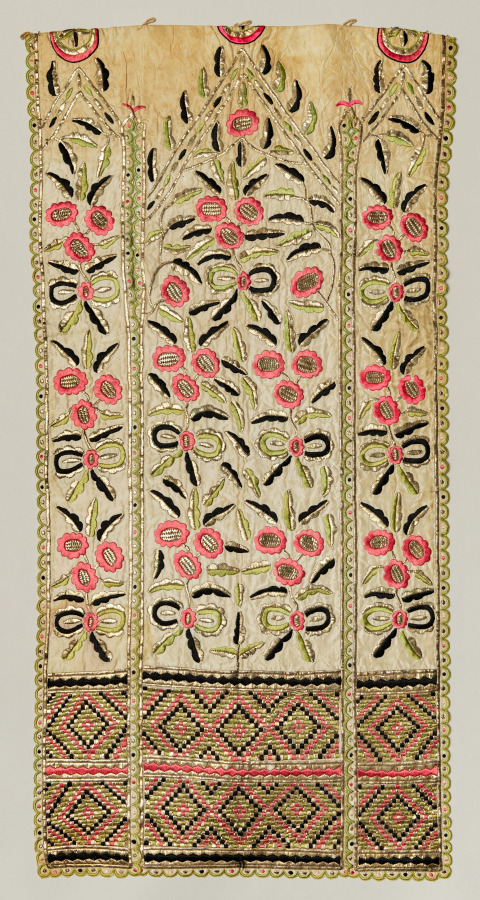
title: Fez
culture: Africa, North Africa, Algeria, Algerian embroiderer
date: early 1900s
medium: Silk, metal threads, dye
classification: Embroidery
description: This textile is made of plain weave silk, and embroidered with dyed silk threads and flat, metal strips that pass through both layers of this cloth. The textile is reversible (save for some details on the rosettes). Its form is unusual, but resembles a hanging (note the small loops along the top edge) or doorway partition, with its three flaps suitable to let a breeze pass through. The pattern of broad rosettes is widespread across the Mediterranean in the late 19th and early 20th century.